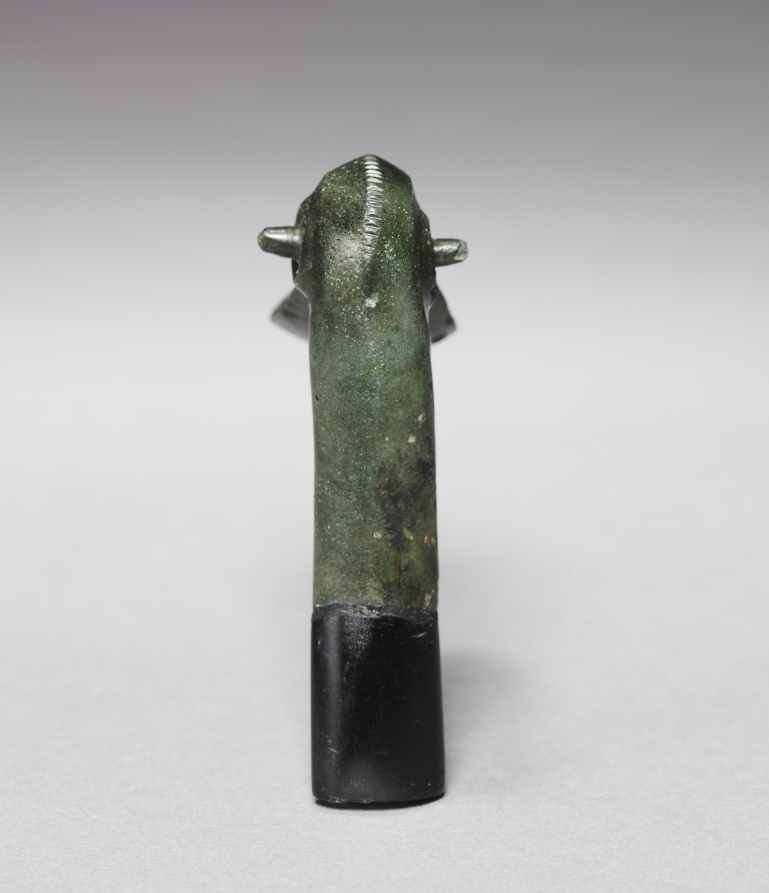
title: Duck Head Finial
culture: possibly Hungary, Bronze Age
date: c. 1400–1300 BCE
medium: bronze, cast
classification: Sculpture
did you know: A decorative object, this duck head finial likely topped a piece of furniture.